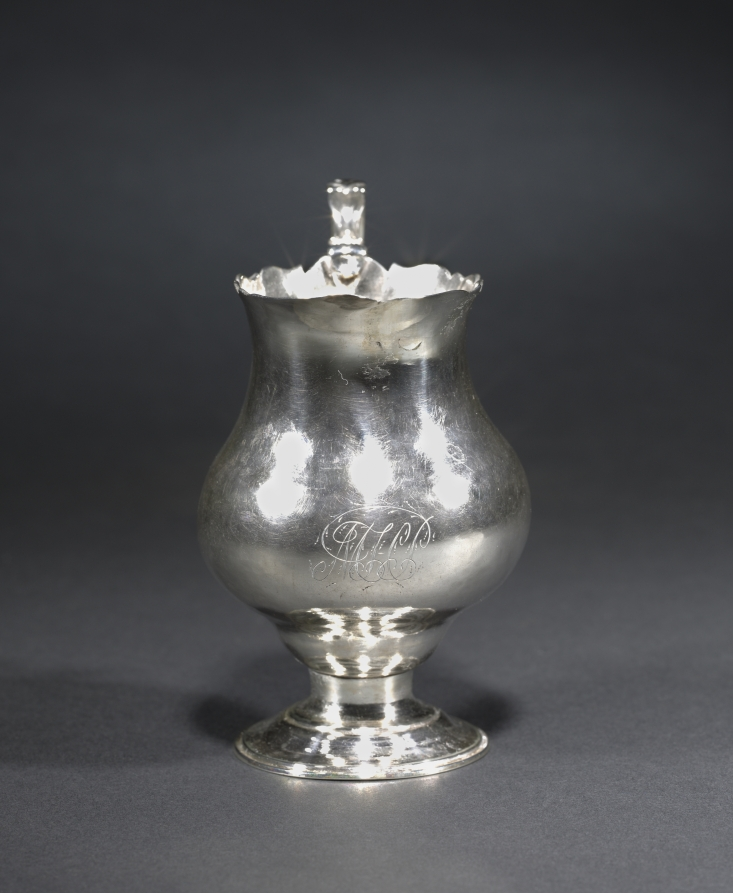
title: Cream Pitcher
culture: America, Massachusetts, Boston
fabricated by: Paul Revere II (American, 1735–1818)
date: c. 1765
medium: silver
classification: Silver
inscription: "P . . .H/to/P . . .E" in block letters under foot, and "MHP" in bright-cut script on front, opposite handle.